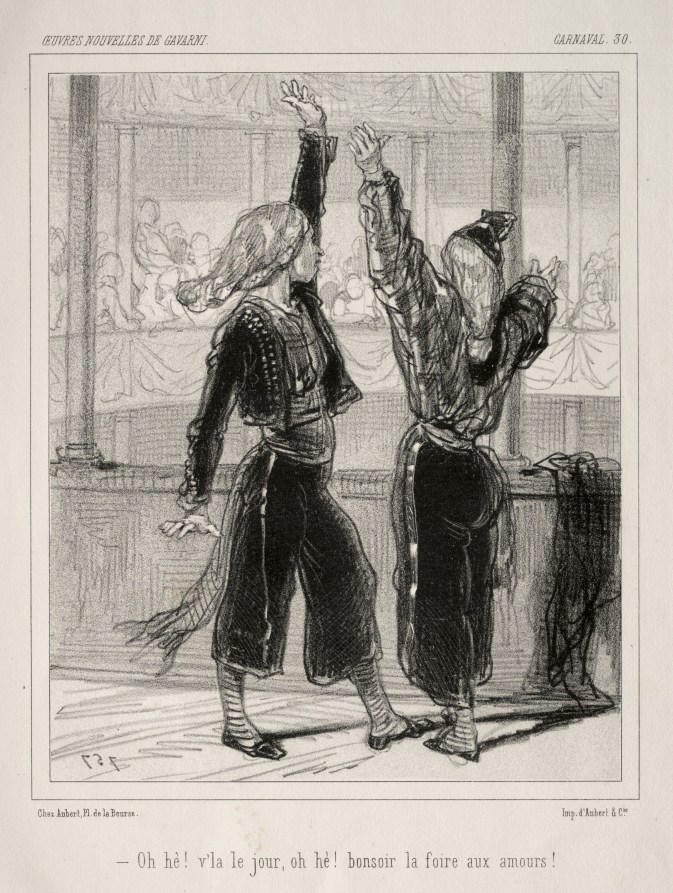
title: Carnaval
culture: France, 19th century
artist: Paul Gavarni (French, 1804–1866)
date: c. 1841–47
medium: lithograph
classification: Print